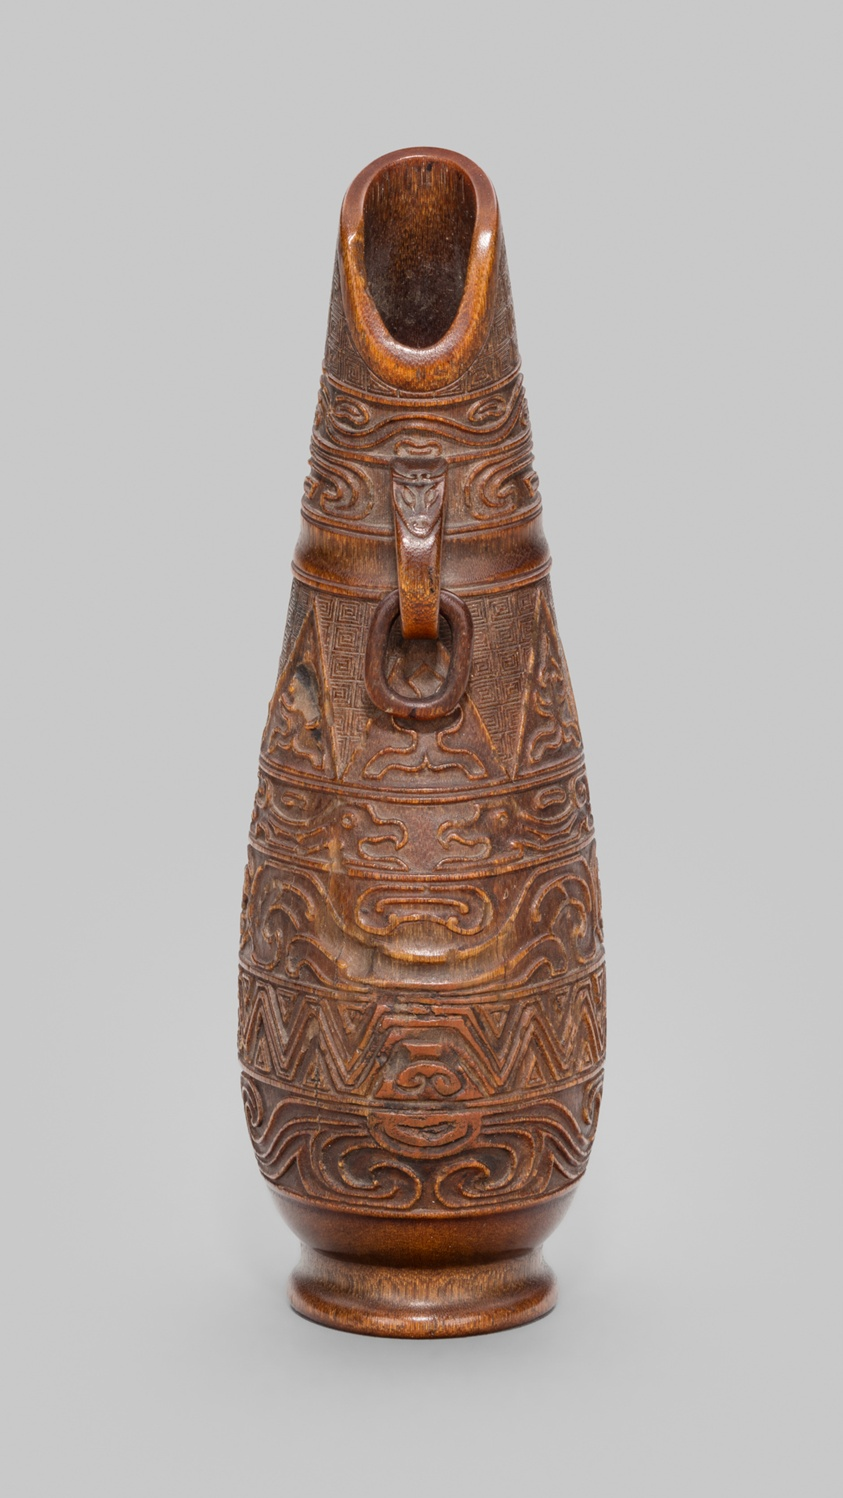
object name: Vessel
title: Miniature Bottle in the Form of an Ancient Bronze Jar (Hu)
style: Chinese (culture or style)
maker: China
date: Ming dynasty (1368–1644)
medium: Rhinoceros horn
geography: China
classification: rhinocerous horn; horn; vessel; asian art